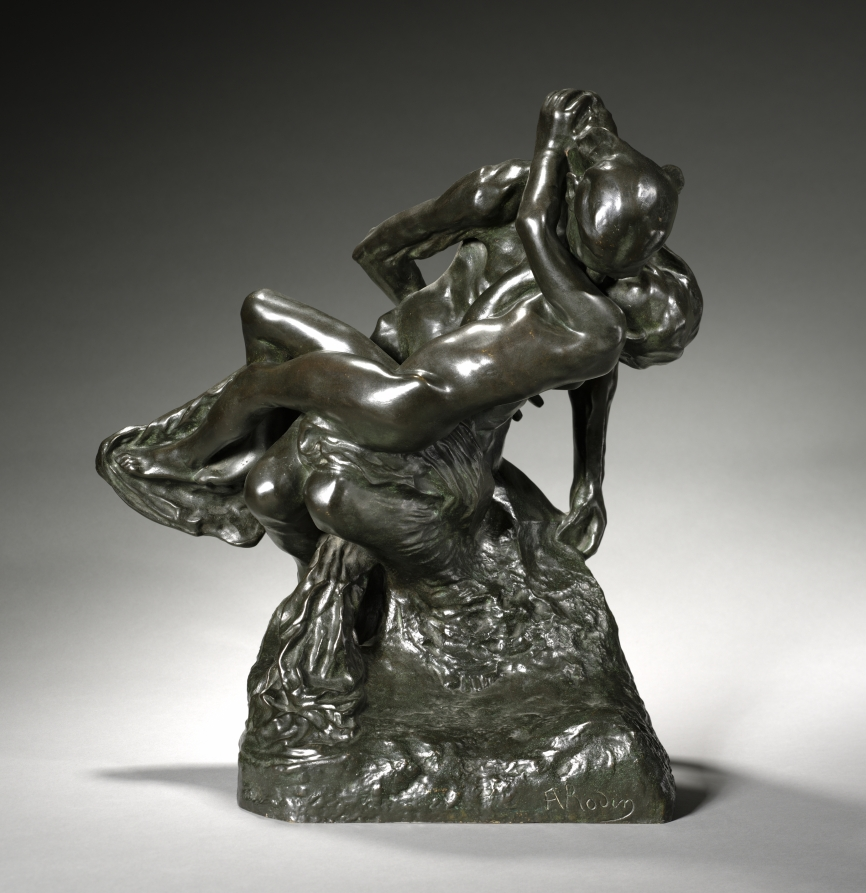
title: Triumphant Youth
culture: France, 19th century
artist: Auguste Rodin (French, 1840–1917)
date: c. 1894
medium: bronze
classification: Sculpture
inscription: Signed front left: "A. Rodin"